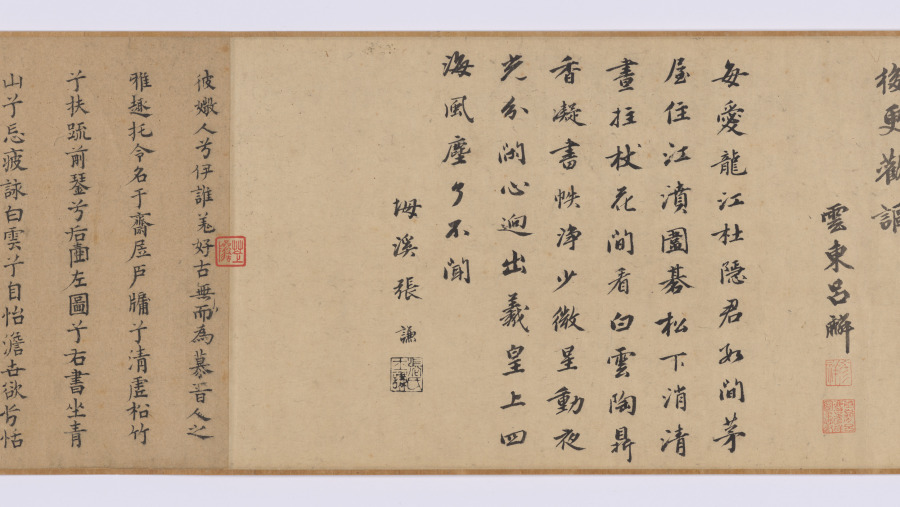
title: Leisure Enough to Spare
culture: China, Yuan dynasty (1271-1368)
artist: Yao Tingmei (Chinese, active mid-1300s)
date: 1360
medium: handscroll, ink on paper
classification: Painting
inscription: 至正廿年春正月_日作此併系鄙語于尾 地偏人遠閉柴關，滿院松陰白晝閒。 眼底風塵渾忘却，坐看流水臥看山。 吳興姚廷美畫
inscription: 23 colophons and 53 seals (dates unavailable for some): 1 colophon, dated 1360, and 2 seals of Yang Weizhen (1296-1370); 1 colophon and 3 seals of Wan Yi; 1 colophon of Zhang Junde; 1 colophon and 3 seals of Angji (act. ca. mid-14th c.); 1 colophon and 1 seal of Xu Shiquan; 1 colophon and 3 seals of Gao Yu; 1 colophon and 2 seals of Li Mingfu; 1 colophon and 2 seals of Lu Lin; 1 colophon and 1 seal of Zhang Qian; 1 colophon of Tao Tangwen; 1 colophon and 1 seal of Wu Yuangui (act. ca. 1300-60); 1 colophon of Bao Jiong; 1 colophon of Wang Zao; 1 colophon and 1 seal of Ma Chuyi; 1 colophon and 1 seal of Lin Yizhuang; 1 colophon and 1 seal of Gu Shunju; 1 colophon and 2 seals of Wang Jing; 1 colophon and 2 seals of Lin Shouchang; 1 colophon and 1 seal of Gao Zhidao; 1 colophon of Lin Xun; 1 colophon, dated 1359, and 2 seals of Meng Weicheng (act. mid-14th c.); 1 colophon and 1 seal of Meng Zhiji (act. mid-l4th c.); 14 seals of Liang Qingbiao 梁清標 (1620-1691); 1 poem dated 1755 and 5 seals of the Qianlong 乾隆 emperor (r. 1736-95); 2 seals of the Jiaqing 嘉慶 emperor (r. 1796-1821); 3 seals of the Xuantong 宣統 emperor (r. 1909-11).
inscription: Title on frontispiece by Zhang Bi 章弼: Signed Gongchen 拱辰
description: Seclusion and leisure—the ideals of the literati, or scholar-gentlemen—are expressed in this mature work by Yao Tingmei. The theme acquired special meaning at a time of the military uprisings near the end of the Yuan dynasty. Dedicated to an ascetic named Du, this work combines painting, calligraphy, and poetry; following the painting are more than 20 poems and essays written by notable scholars, one of whom was the calligrapher Yang Weizhen. It reveals not only the aesthetic taste of the literati but also the practice of contributing artistic and literary works to fulfill social obligations. Yao's painting demonstrates his individual style derived from various ancient masters (Guo Xi, Dong Yuan, and Juran). Yang Weizhen's calligraphy exhibits his bold, vigorous style and his intent to capture the spirit of antiquity in art.